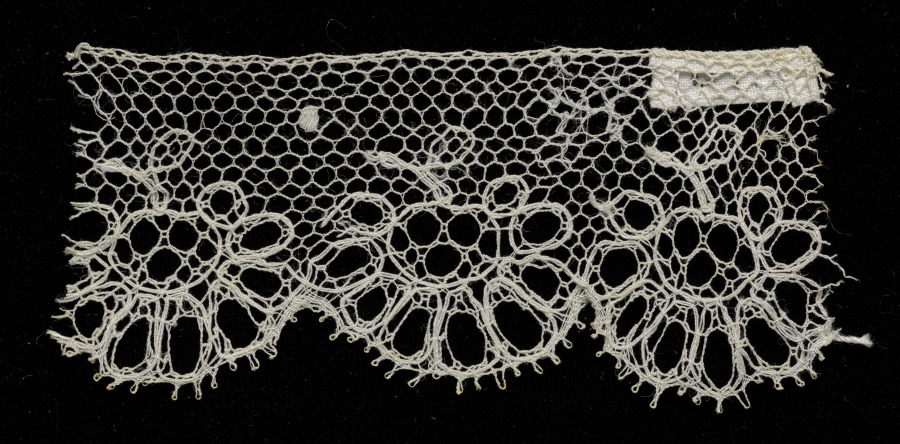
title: Lace Edging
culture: Spain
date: 1800–1840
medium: Bobbin lace (blonde lace)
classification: Lace